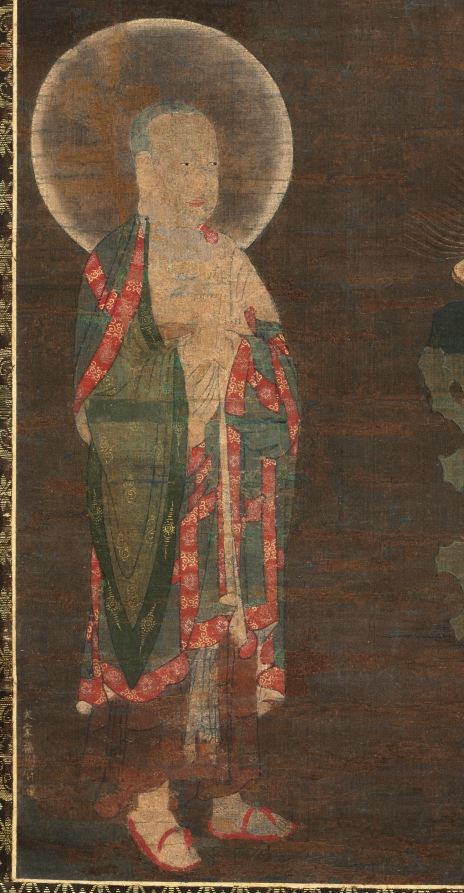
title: Shakyamuni Triad: Buddha Attended by Manjushri and Samantabhadra (Buddha)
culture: China, Fuzhou, Fujian Province, Yuan dynasty (1271-1368)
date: late 1300s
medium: Hanging scroll; ink and color on silk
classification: Painting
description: This triptych is a rare example of Yuan Buddhist painting. It depicts the historic Buddha Shakyamuni flanked by two attending bodhisattvas, Manjushri (the bodhisattva of wisdom, riding a lion) and Samantabhadra (the bodhisattva of universal virtue, riding an elephant). Below them are others seeking enlightenment: two disciples of the Buddha (Ananada and Kasyapa), two non-Chinese people, a boy with topknots, and a female worshiper. The clouds above and around the divine beings form one scene that illustrates Shakyamuni’s sermon from the Lotus Sutra. This text became an important basis for Buddhist faith throughout East Asia and was central to the Mahayana school of Buddhism.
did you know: Shakyamuni is seated cross-legged on the throne with the hand gesture (mudra) of giving instruction.